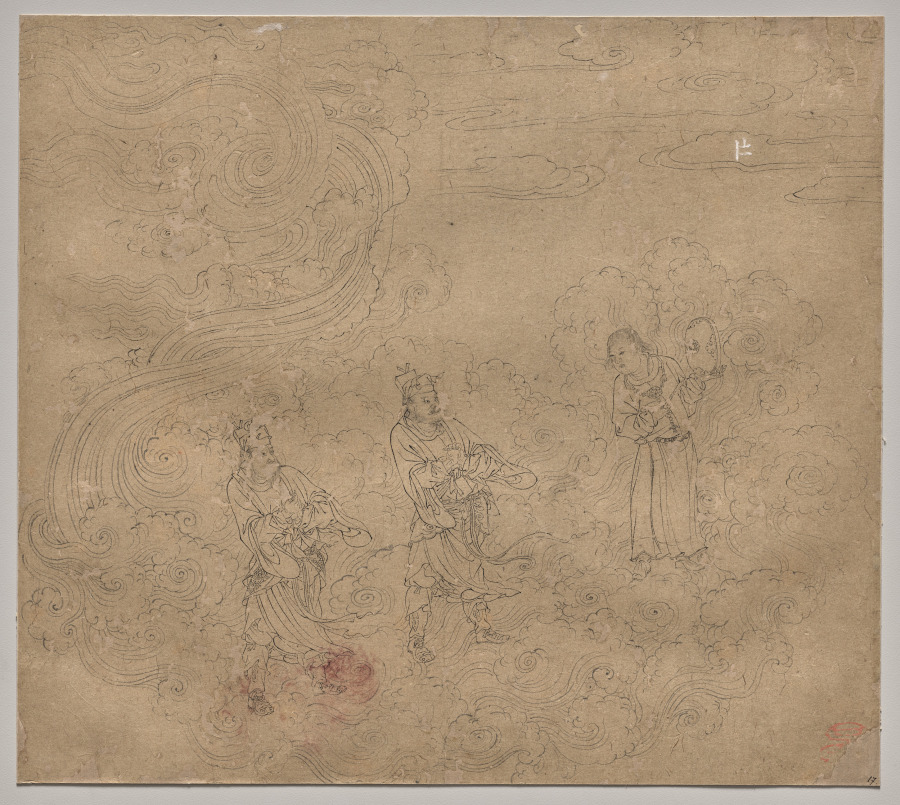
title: Album of Daoist and Buddhist Themes: Procession of Daoist Deities: Leaf 17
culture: China, Southern Song dynasty (1127-1279)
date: 1200s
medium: Album, ink on paper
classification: Painting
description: This extraordinary album has 50 paintings on a variety of religious subjects. They were likely created by several master craftsmen to share with studio apprentices as models for fulfilling commissions. The Jade Emperor and the Daoist pantheon make up the first 26 leaves. The next 14 leaves portray the Buddhist Ten Kings of Hell administering punishments to the dead. The third section, called “Clearing the Mountains,” features divine soldiers, led presumably by the deity Erlang Shen 二郎神, fighting undesirable creatures.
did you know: The Daoist Gods of Wind and Fire are attended by a young boy holding a drum and drumstick.